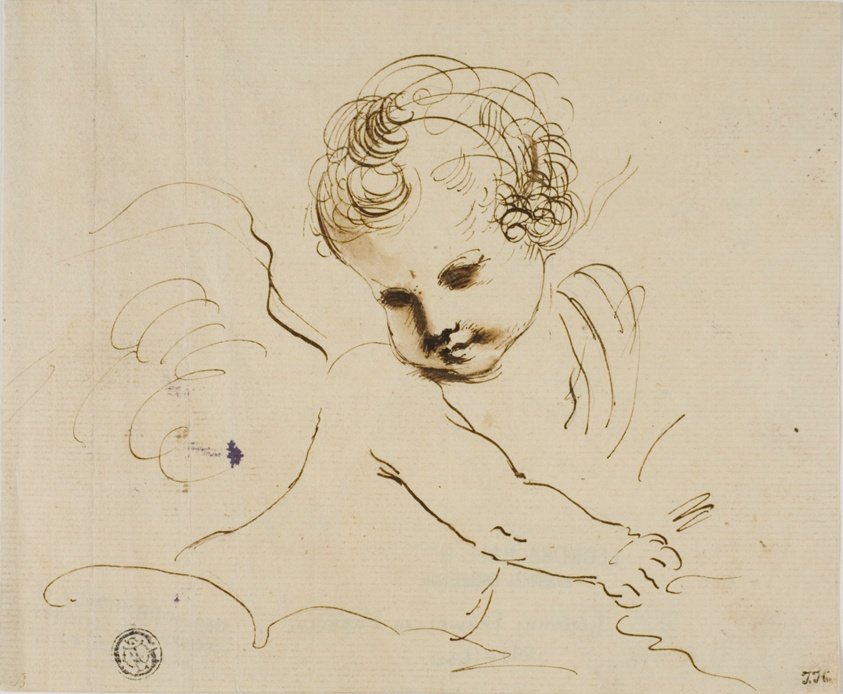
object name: Drawing and Watercolor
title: Putto in the Clouds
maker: After Guercino; Italian, 1591-1666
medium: Pen and brown ink, with brush and brown wash, on cream laid paper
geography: Italy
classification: pen and ink drawings; drawings (visual works); prints and drawing